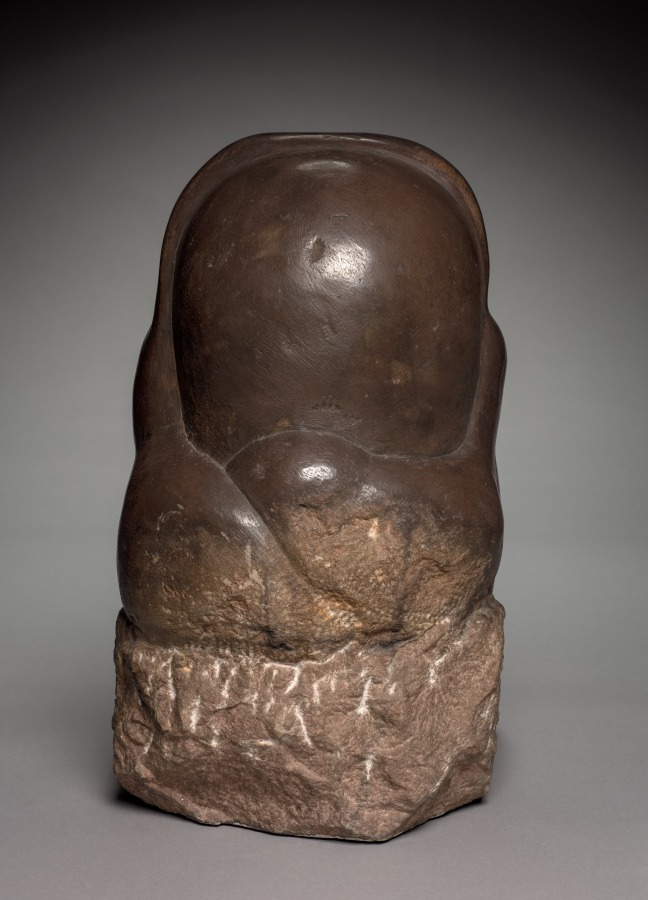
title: Head of Woman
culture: America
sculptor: Gaston Lachaise (American, born France, 1882–1935)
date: 1920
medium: pink Tennessee marble and black pigment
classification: Sculpture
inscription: Signed on base: G. LACHAISE 1923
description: Gaston Lachaise acknowledged that his wife, Isabel Dutaud Nagel Lachaise, was "the primary inspiration which awakened my vision and the leading influence that has directed my forces." Head of a Woman is one of several sculpted portraits he made of her.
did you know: Born in Paris, France, Gaston Lachaise immigrated to the United States in 1906.